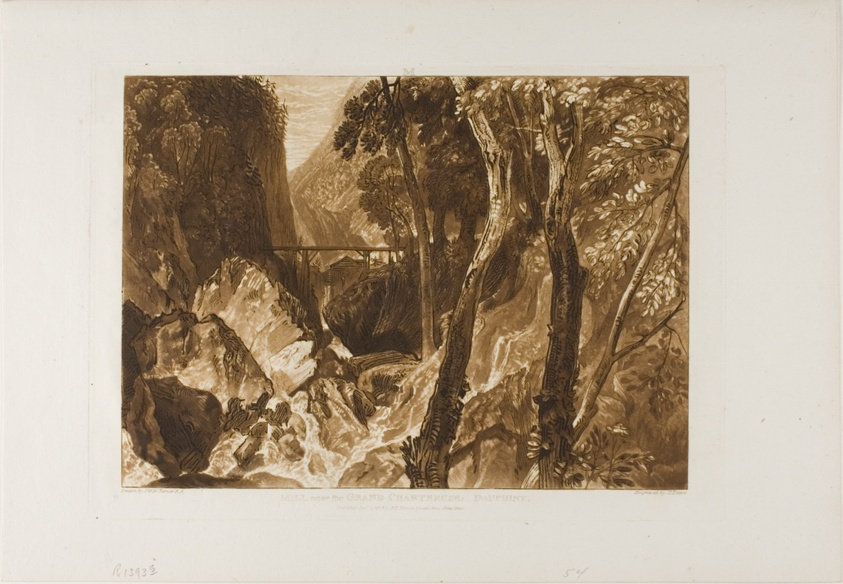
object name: Print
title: Mill near the Grand Chartreuse, plate 54 from Liber Studiorum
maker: Joseph Mallord William Turner (English, 1775-1851); Engraved by H. Dawe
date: published January 1, 1816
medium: Etching and engraving in brown on ivory laid paper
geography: England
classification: etching; print; prints and drawing